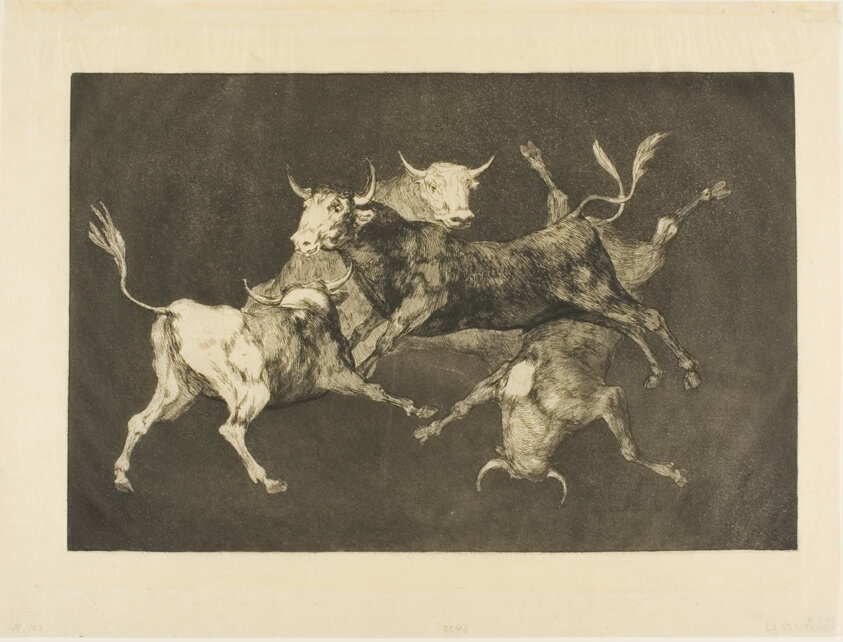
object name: Print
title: Fool’s Folly, from Disparates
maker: Francisco José de Goya y Lucientes (Spanish, 1746–1828); printed by François Liénard (French, active 1860s–1880s)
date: 1816–19, published 1877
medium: Etching and burnished aquatint in black on Japanese paper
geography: Spain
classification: etching; print; prints and drawing